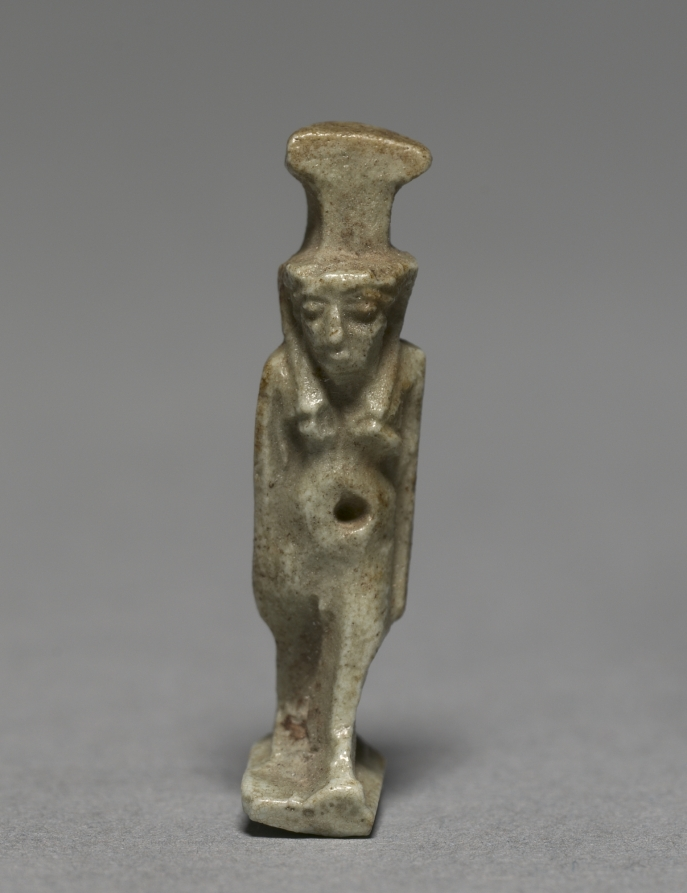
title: Amulet of Nephthys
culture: Egypt, Late period (715–332 BCE), Dynasty 30–Greco-Roman period (332 BCE–395 CE), Ptolemaic dynasty (305–30 BCE)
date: 380–30 BCE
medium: gray green faience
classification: Amulets